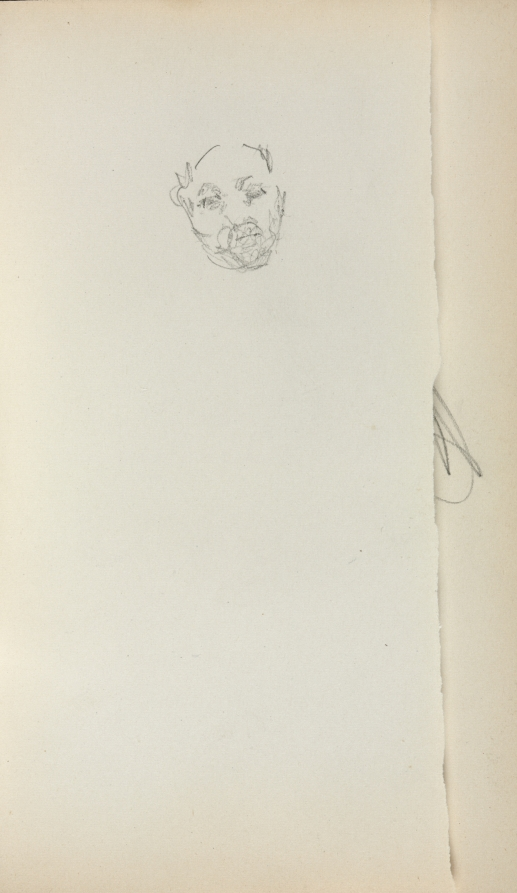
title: Italian Sketchbook: Head of a Man (page 221)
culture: America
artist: Maurice Prendergast (American, born Newfoundland [now Canada], 1858–1924)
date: 1898–1899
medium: pencil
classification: Bound Volume